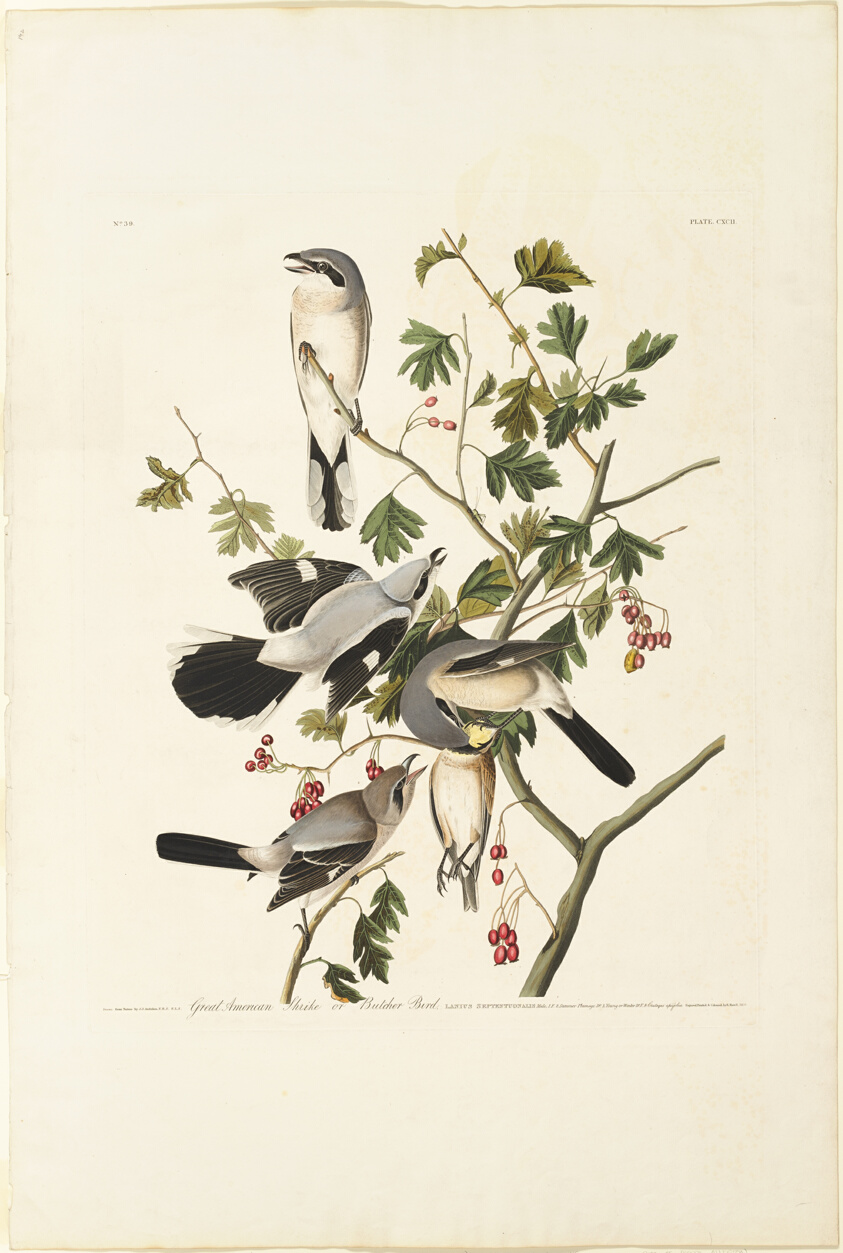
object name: Print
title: Great American Shrike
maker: Robert Havell (English, 1793-1878); after John James Laforest Audubon (American, 1785-1851)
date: 1834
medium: Hand-colored engraving, with aquatint, on ivory wove paper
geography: England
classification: lithograph; print; prints and drawing